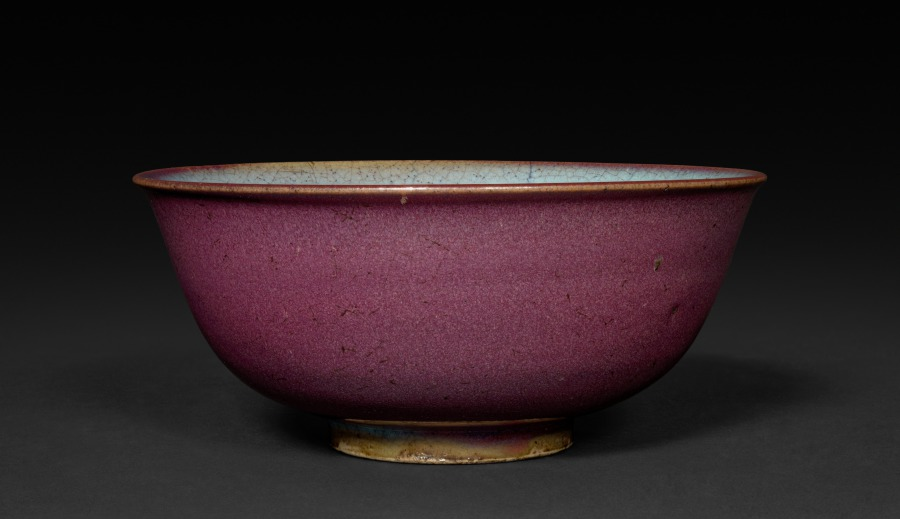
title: Bowl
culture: South China, Yuan dynasty (1271–1368) to Ming dynasty (1368–1644)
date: 1300s–1400s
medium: glazed gray stoneware, Jun ware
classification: Ceramic